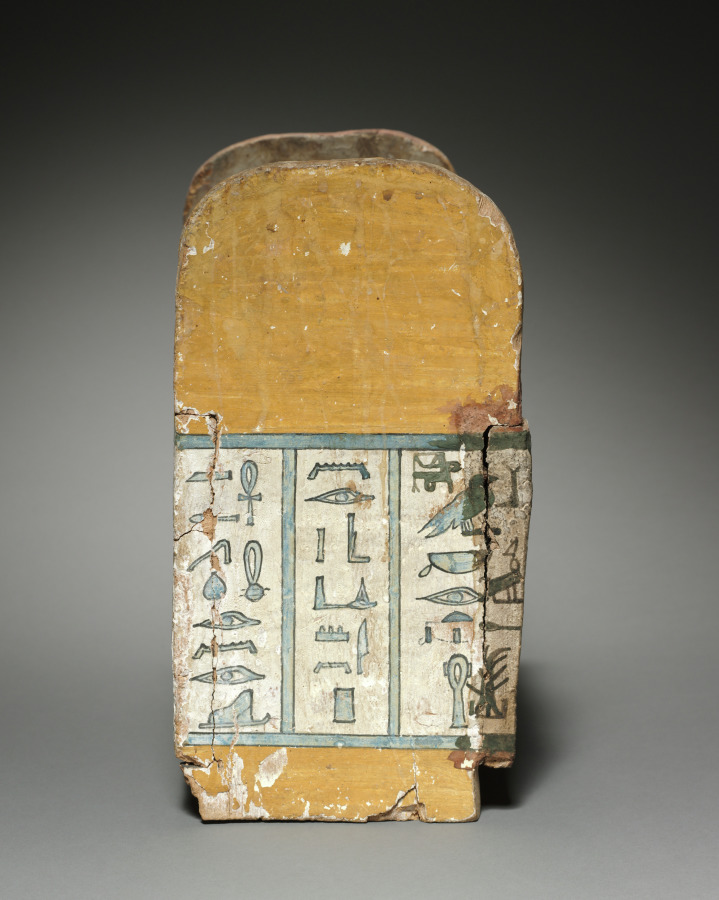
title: Covered Box for Shawabtys of Ditamenpaankh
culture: Egypt, Late period (715–332 BCE), Dynasty 25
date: 715–656 BCE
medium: painted wood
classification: Funerary Equipment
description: High demand for shawabtys in the Late Period, a time when as many as 400 or more shawabtys were placed in the tomb with the deceased, gave rise to a specialized container for storing them: the shawabty box. This example is inscribed for the lady of the house, Ditamenpaankh, and was probably one of a pair originally made for her. The single-masted boat on the box’s lid is perhaps an allusion to the pilgrimage of the deceased to the holy city of Abydos, the cult city of Osiris, king of the dead. The shawabtys inside are crude, mass-produced examples cast in an open mold. Made of terracotta, their blue paint imitates more costly shawabtys made of faience. As for the shawabty spell, it has been removed from its traditional location on the shawabty’s front and relocated onto the sides of box, where it needed only to be written once, thus expediting production.